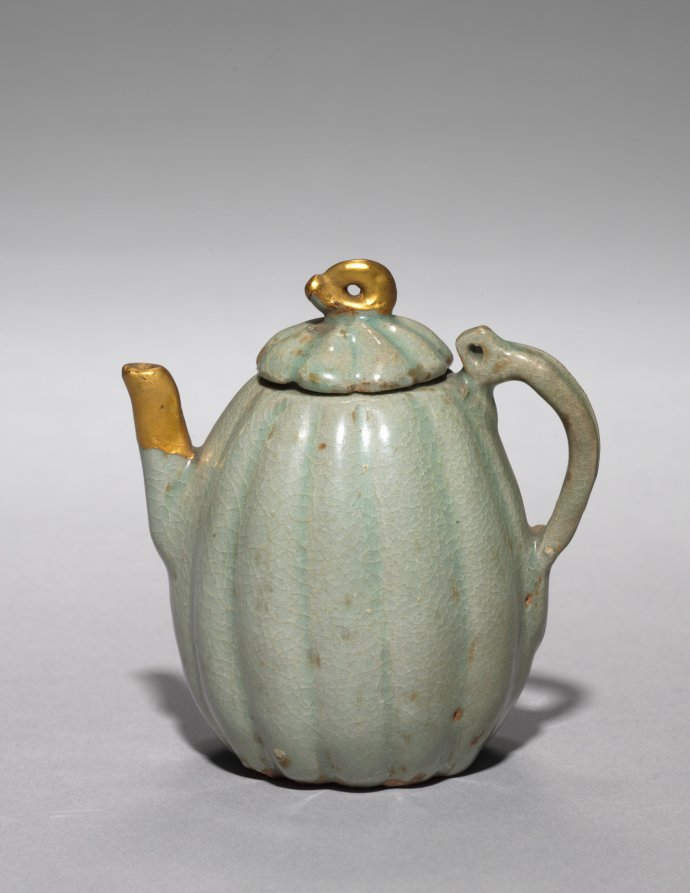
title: Melon-shaped Wine Ewer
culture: Korea, Goryeo dynasty (918–1392)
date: 1100s-1200s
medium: celadon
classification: Ceramic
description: Many celadon ceramics, such as these two miniature pots, have been repaired with gold lacquer. Termed kintsugi (literally meaning “gold joinery”) in Japanese, this restoration method highlights broken parts with glittering gold mixed with lacquer. Initiated in Japan in the 1400s, the technique follows a popular aesthetic concept called wabi-sabi, which finds beauty in imperfect things. Goryeo celadons were considered rare treasures among Japanese collectors in the early 1900s; thus, their broken condition is brilliantly highlighted in gold lacquer, as seen here in the repaired spouts, handle, and lid.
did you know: This miniature wine pot was buried in a tomb for the soul of the deceased.